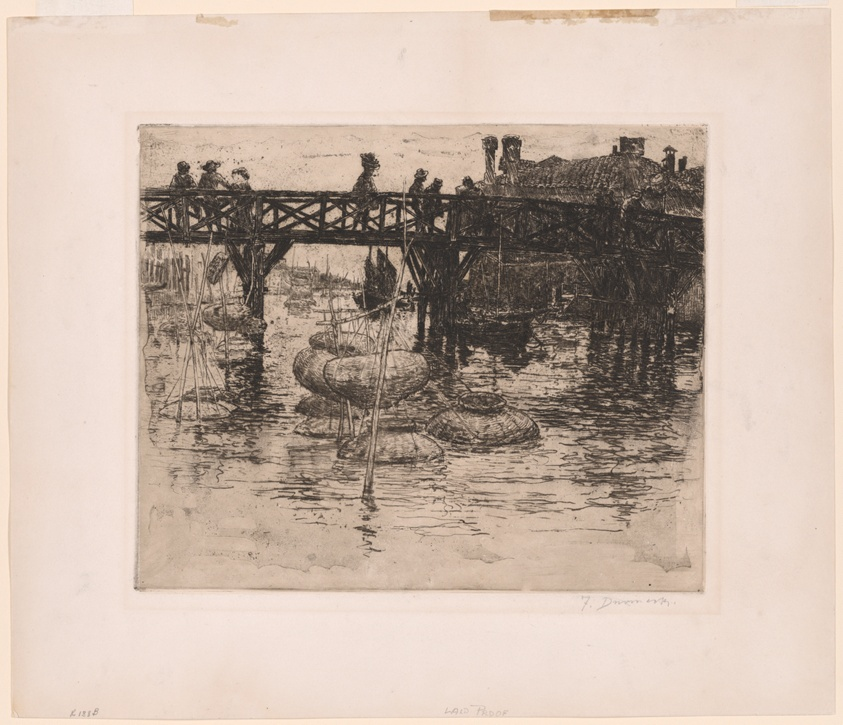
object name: Print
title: San Pietro in Castello (Small Plate)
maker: Frank Duveneck (American, 1848-1919)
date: 1883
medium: Etching in black on cream Japanese paper, laid down on cream wove paper (chine collé)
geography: United States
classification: prints and drawing; paper; print; etching